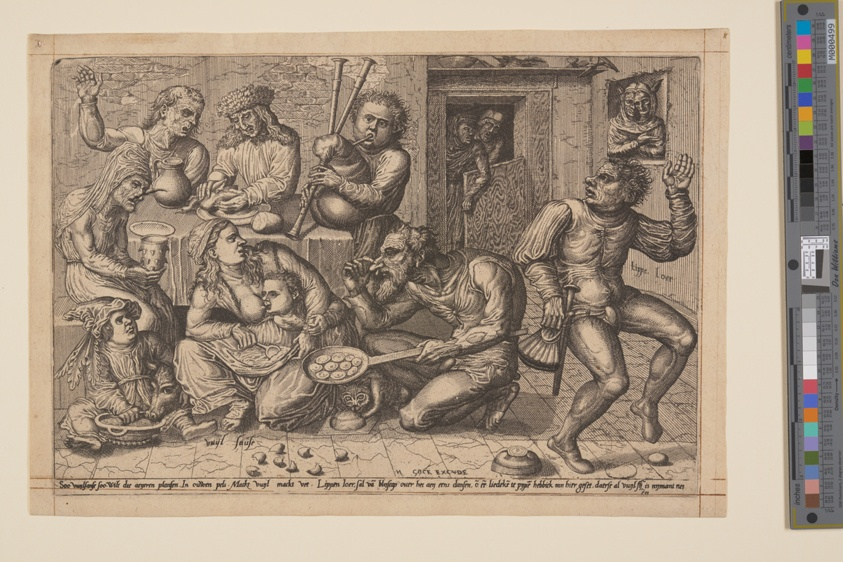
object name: Print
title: Vuyl Sause (Dirty Sauce)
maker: Unknown Artist; after Jan Verbeeck (Flemish, c. 1520-c. 1569)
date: c. 1559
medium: Etching on ivory laid paper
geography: Flanders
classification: print; paper; prints and drawing; etching